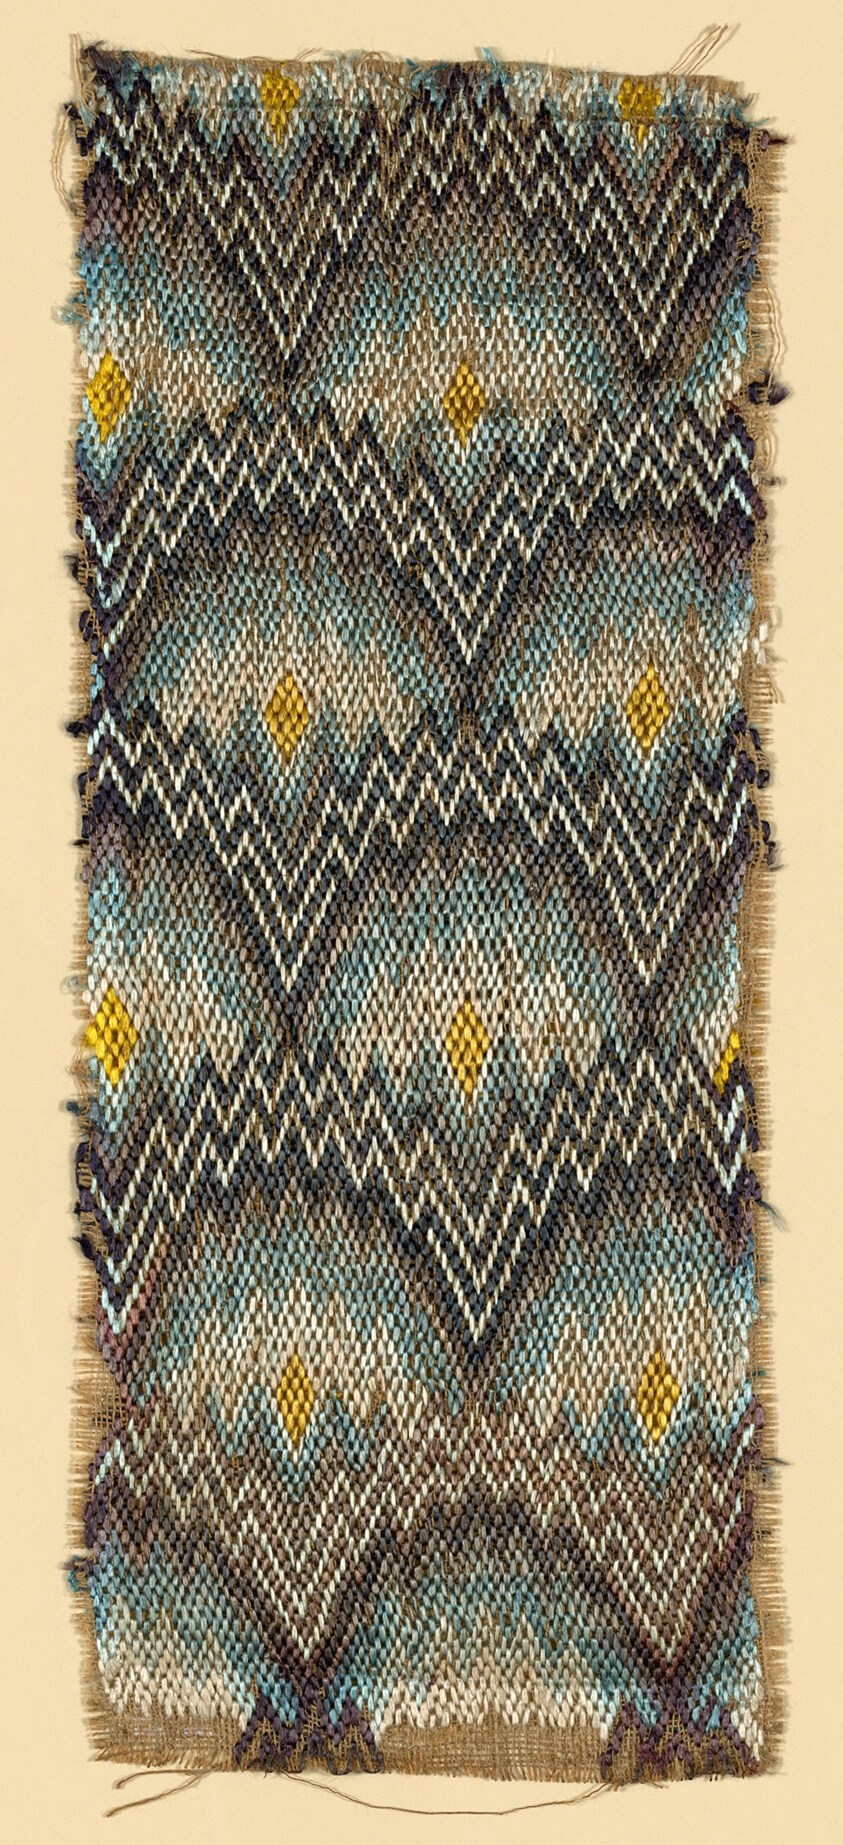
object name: Textile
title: Fragment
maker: Italy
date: 17th century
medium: Linen, plain weave; embroidered with silk floss in flame stitch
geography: Italy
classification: textile; needlework (visual works)